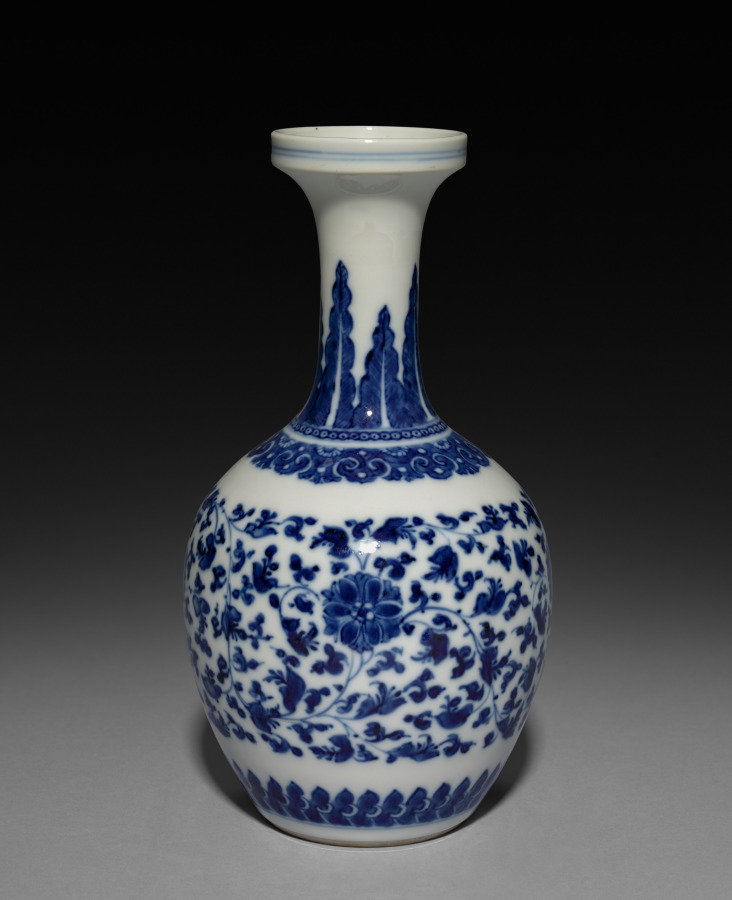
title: Globular Vase with Long Neck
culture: China, Qing dynasty (1644-1911), Kangxi reign (1661-1722)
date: 1661–1722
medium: porcelain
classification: Ceramic